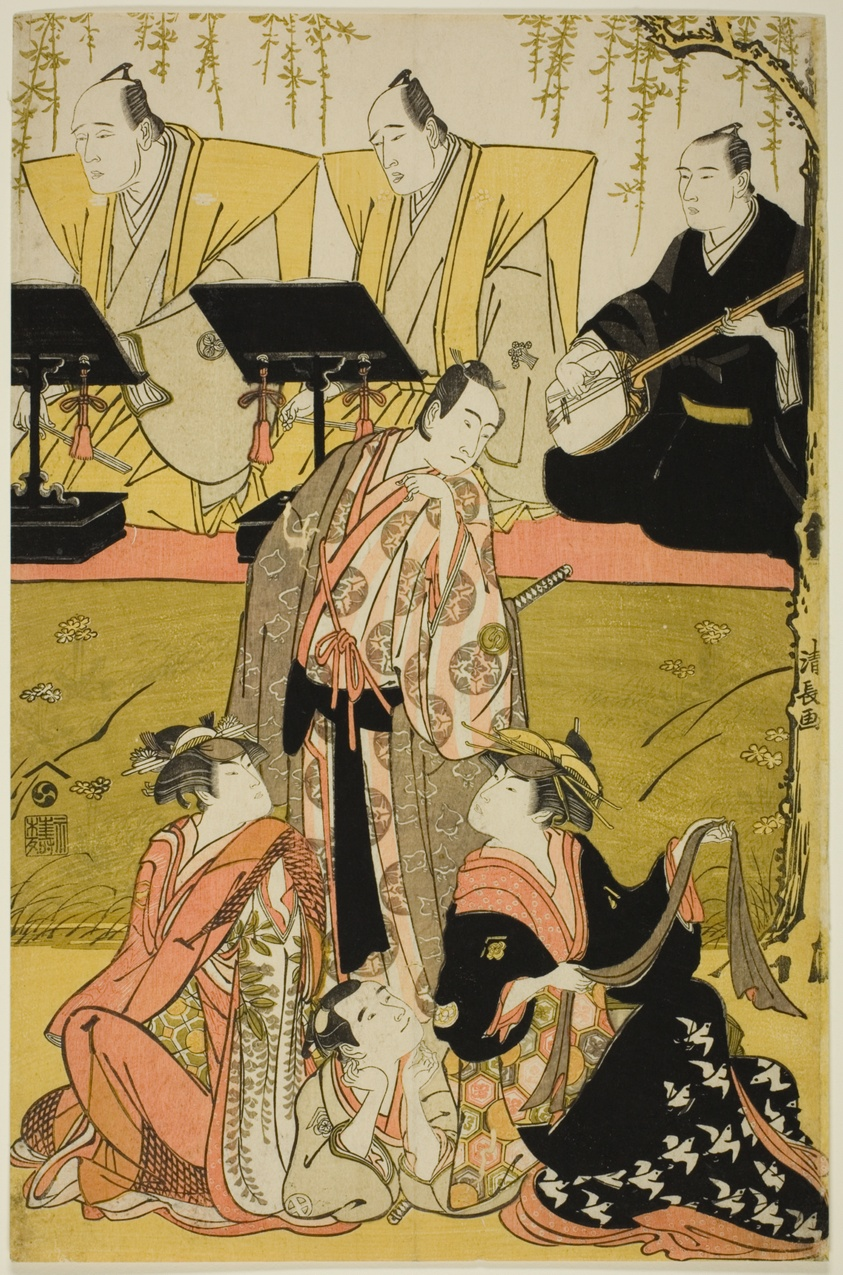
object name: Print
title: The Actors Sawamura Sojuro III as Soga no Juro, Osagawa Tsuneyo II as Oiso no Tora, Azuma Tozo III as Miura Katagai, and Otani Tokuji I as Danzaburo, in the joruri "Chidorigake Koi no Tamaboko," performed at the Ichimura Theater in the first month, 1784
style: Japanese (culture or style)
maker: Torii Kiyonaga (Japanese, 1752-1815)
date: 1784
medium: Color woodblock print; oban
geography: Japan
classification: woodblock print; print; asian art